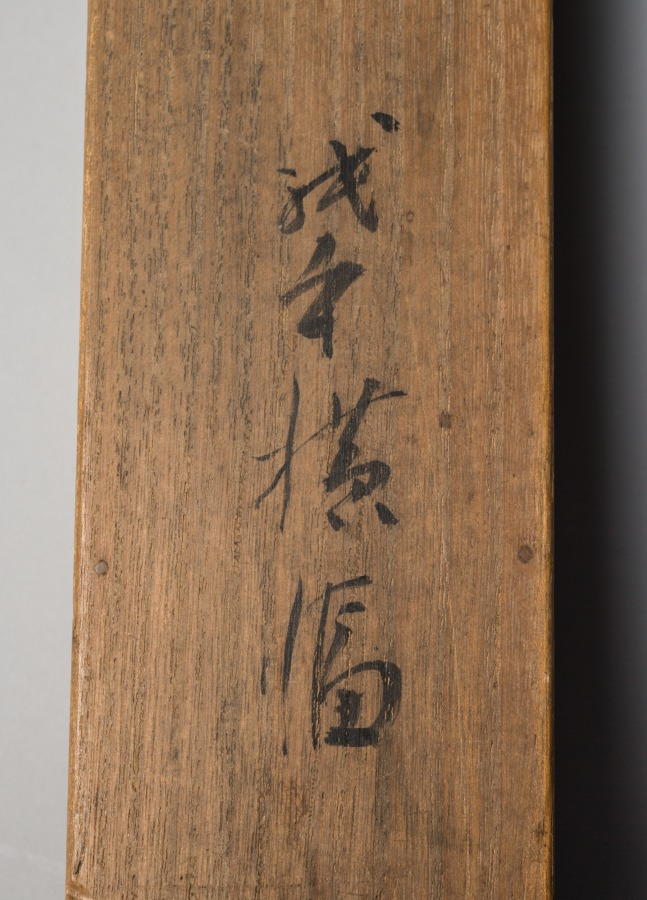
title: Needlefish (Yagara)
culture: Japan, Edo period (1615–1868)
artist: Nakajima Raishō (Japanese, 1796–1871)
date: 1870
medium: hanging scroll; ink and color on paper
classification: Painting